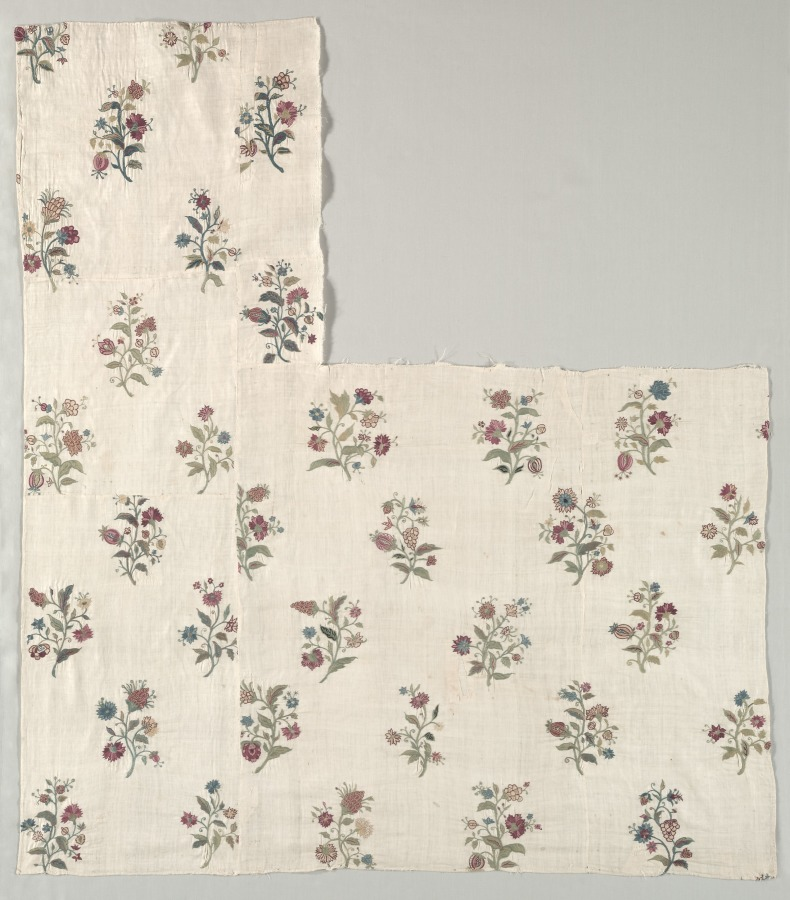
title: Embroidered Covers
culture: France, 18th century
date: 1700s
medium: embroidery, silk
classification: Embroidery